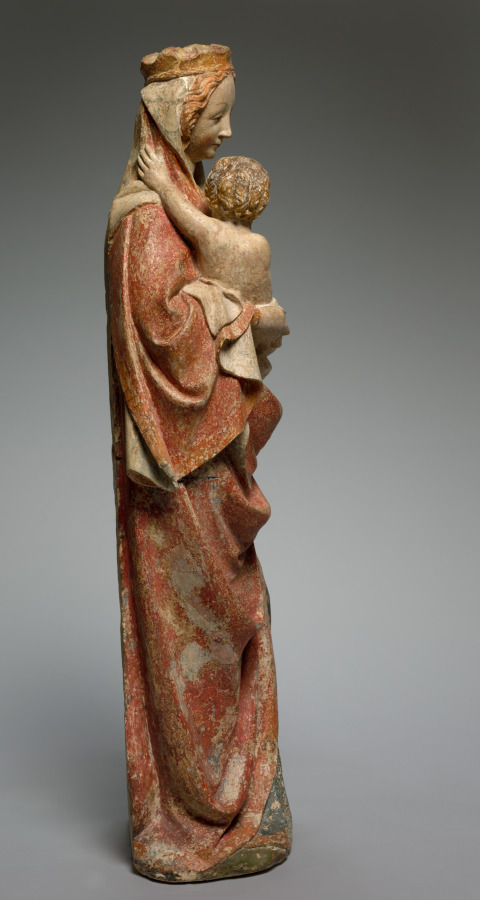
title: Virgin Nursing the Christ Child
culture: France, Île de France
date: c. 1370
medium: painted limestone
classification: Sculpture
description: This sculpture of the Virgin Mary nursing the Christ child subtly emphasizes the intimate relationship between mother and child and brings the Son of God in his human existence closer to the viewer. The emotional interaction is characteristic of sculpture since the mid-1300s, especially in the circles close to the court of the French kings in Paris and Emperor Charles IV (reigned 1346–78) in Prague. These novel stylistic tendencies were possibly a reaction to the fear and uncertainty incurred by the first great plague wave in 1348.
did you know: The back of this sculpture is unfinished since it would have originally been placed against a wall or pier.